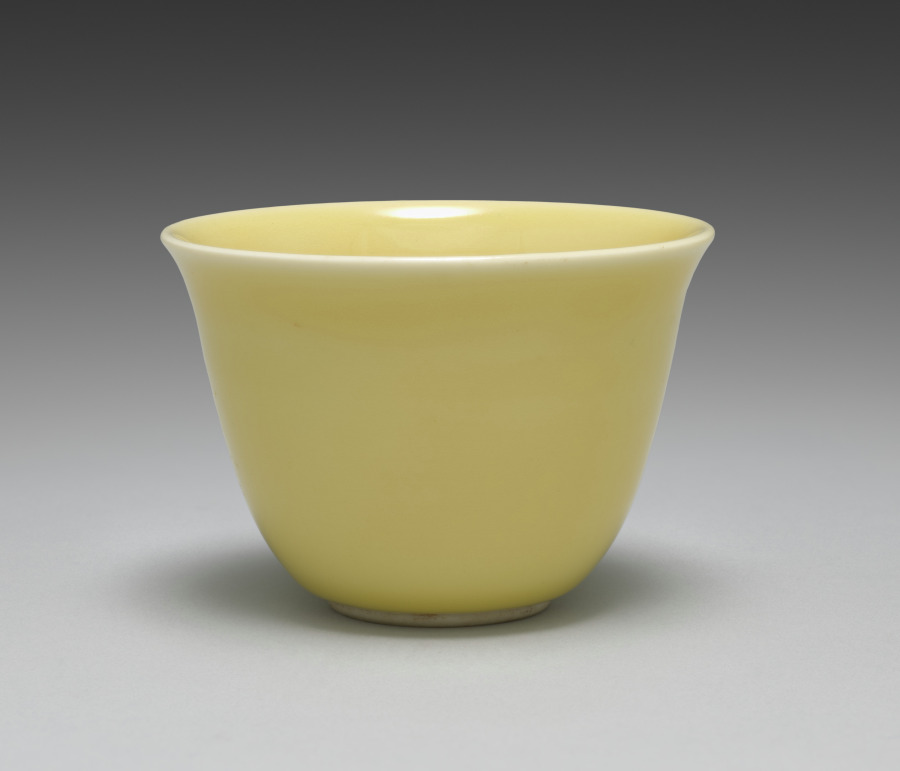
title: Cup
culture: Japan, Taishō period (1912–26) or Shōwa period (1926–89)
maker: Seifū Yohei IV (Japanese, 1872–1951)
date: 1914–46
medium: porcelain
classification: Ceramic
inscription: 清風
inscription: 清風造 【印】成山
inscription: 清風盧人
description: Like his father, Yohei IV also produced works with red or yellow monochrome glazes. His yellow-glazed works include this set of five drinking cups, a pair of sake pourers CMA 2022.216, and a sweets bowl molded into the shape of a chrysanthemum CMA 2022.218.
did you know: Seifū Yohei IV learned the ceramics industry from his father and painting from Tanomura Shosai.